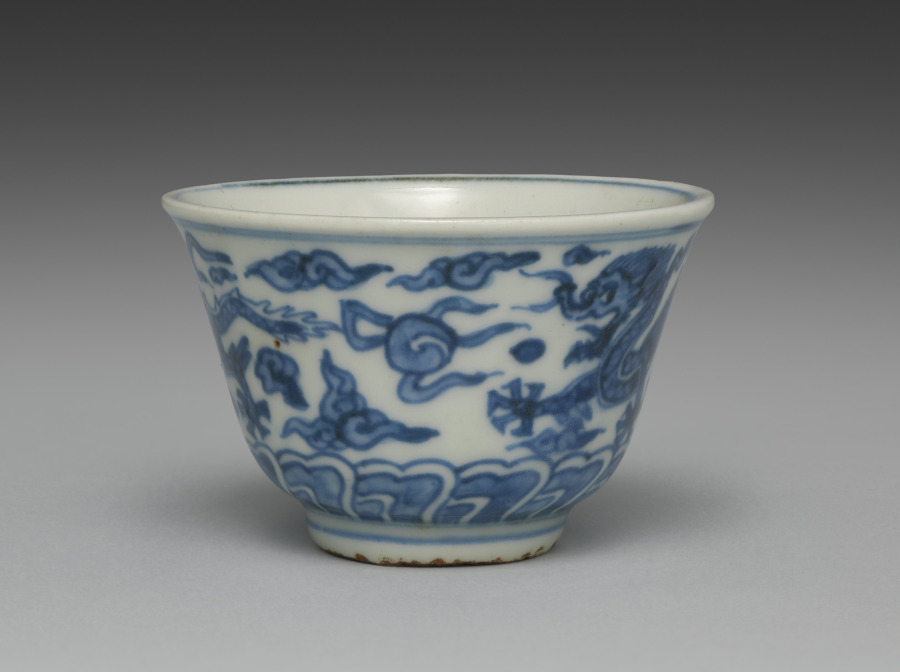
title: Cup from Tea Cups with Dragons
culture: Japan, Edo period (1615–1868)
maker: Seifū Yohei I (Japanese, 1801–1861)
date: 1840s–57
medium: One from a set of five tea cups; porcelain with underglaze blue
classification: Ceramic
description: Seifū Yohei I made both blue and white porcelains after Ming dynasty (1368–1644) Chinese wares fired in the kilns at Jingdezhen for export. He also made colorful stoneware in the style of his teacher, Nin’ami Dōhachi (Takahashi Dōhachi II) (1783–1855).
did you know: A small figure of an elephant serves as the handle for the lid.